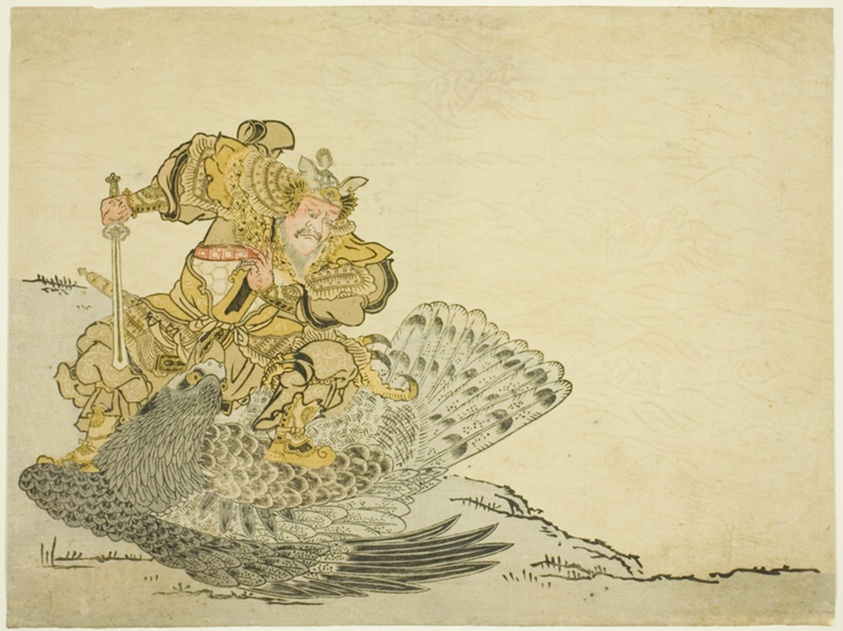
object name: Print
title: Onamushi no Mikoto Killing the Great Bird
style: Japanese (culture or style)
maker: Artist unknown; Japanese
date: 1765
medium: Color woodblock print; chuban yoko-e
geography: Japan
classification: woodblock print; print; asian art